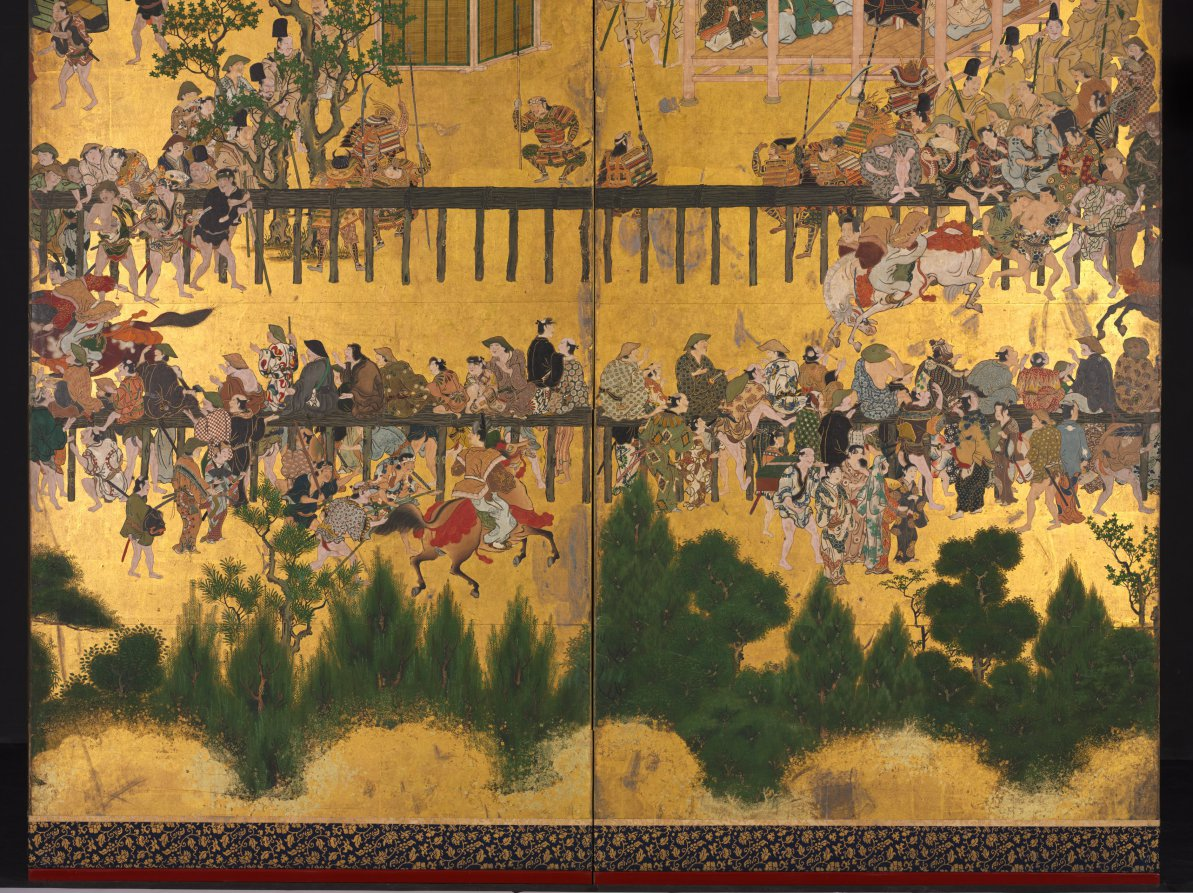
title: Horse Race at the Kamo Shrine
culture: Japan, Edo period (1615–1868)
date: early to mid-1600s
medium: One of a pair of six-panel folding screens; ink and color on gilded paper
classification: Painting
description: Kamo Shrine in Kyoto, seen in the upper half of the left screen, has held an annual horse race on May 5th since the ninth century. Serving as a snapshot of the festivities, this pair of screens captures nearly 600 people watching the race, beginning at the bottom part of the right screen and continuing to the left. The race is a great spectacle where aristocratic riders cling to their fast and unwieldy mounts. While many of those in attendance seem in rapt attention to the main event, other vignettes depict people engaged in an array of activities. This pair of screens was likely originally part of a group of linked murals.